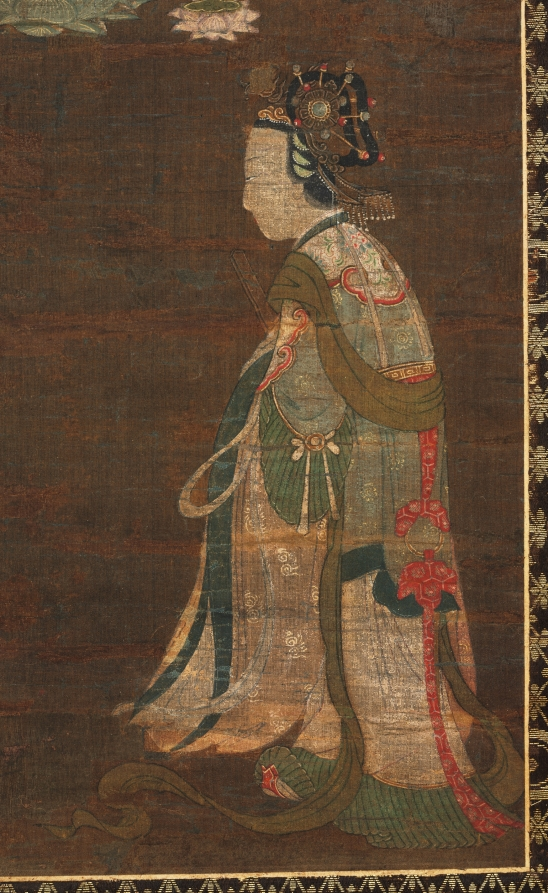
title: Shakyamuni Triad: Buddha Attended by Manjushri and Samantabhadra (Bodhisattva with Elephant)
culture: China, Fuzhou, Fujian Province, Yuan dynasty (1271-1368)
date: late 1300s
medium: Hanging scroll; ink and color on silk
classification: Painting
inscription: Inscription at the bottom of the central scroll reads: "Da Song Fuzhou fu…(Fuzhou prefecture of the great Song)."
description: This triptych is a rare example of Yuan Buddhist painting. It depicts the historic Buddha Shakyamuni flanked by two attending bodhisattvas, Manjushri (the bodhisattva of wisdom, riding a lion) and Samantabhadra (the bodhisattva of universal virtue, riding an elephant). Below them are others seeking enlightenment: two disciples of the Buddha (Ananada and Kasyapa), two non-Chinese people, a boy with topknots, and a female worshiper. The clouds above and around the divine beings form one scene that illustrates Shakyamuni’s sermon from the Lotus Sutra. This text became an important basis for Buddhist faith throughout East Asia and was central to the Mahayana school of Buddhism.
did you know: Samantabhadra, the bodhisattva of universal virtue, is mounted on a six-tusked white elephant standing on lotus flowers.